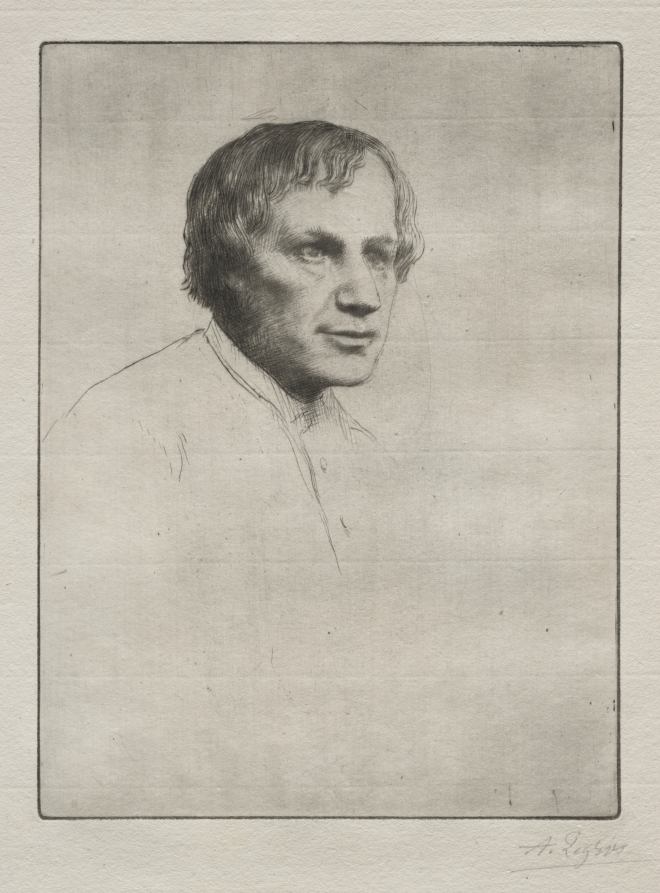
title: Alfred Stevens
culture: France, 19th century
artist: Alphonse Legros (French, 1837–1911)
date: c. 1857–1911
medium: drypoint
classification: Print